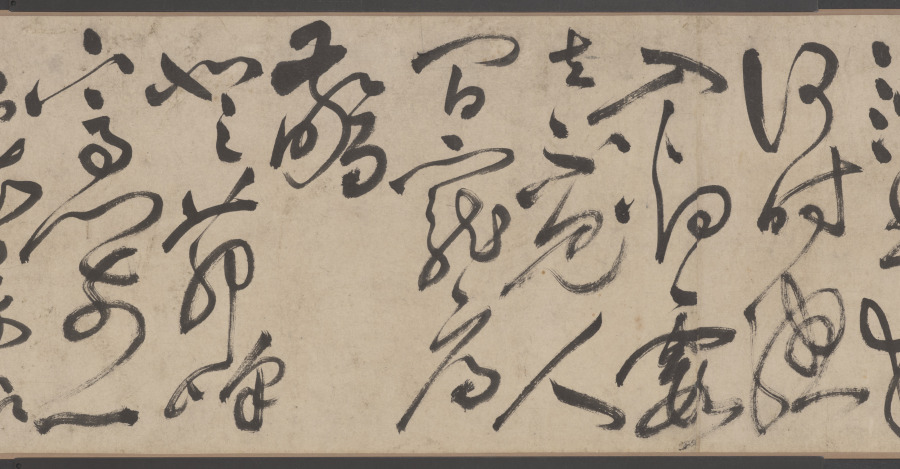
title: Retreat on an Autumn Day, in Cursive Script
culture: China, Ming dynasty (1368–1644)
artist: Zhu Yunming (Chinese, 1460–1527)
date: dated 1523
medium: Handscroll; ink on paper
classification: Calligraphy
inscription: 款識：讌於從一堂，爛漫醉書。癸未（1523）七月晦日也。枝山允明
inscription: 《閒居秋日》逃暑應能蹔閉關，未消多把古賢攀。並拋杯酌方為懶，少事篇章恐礙閑。風墮一庭鄰寺葉，雲開半面隔城山。浮生只說潛居易，隱比求（脫「名」）事更艱。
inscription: 《句曲道中》老至誰憐晝錦明，春來聊得客襟清。宵依星斗宮壇臥，曉（脫「入」）神仙宅舍行。眼看山多城郭少，肩挑詩重簿書輕。何時總入煙霞去。不見人間寵辱驚。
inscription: 《登茆峰》下馬門前一振衣，翠微高迥逼清微。雲端洞裡仙人過，月下山中長史歸。金焰暈牀砂氣伏，紫雲穿竇朮芽肥。神方能詠不能遇，一夜爽靈峰外飛。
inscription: 鈐印：「晞哲」、「允明」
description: This masterwork of calligraphy by Zhu Yunming from Suzhou combines two poems by the artist in cursive script style, characterized by its uninhibited, swift, and intuitive brushwork, so powerful that it here dissolved characters into dots or lines. Written from right to left and top to bottom and alternating in light dry to deep saturated ink, single characters may take a whole column or extend into the next one. Following the movement of the brush, they seem to dance over the paper.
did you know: Zhu Yunming stated that he was in an inebriated state when he created this work.